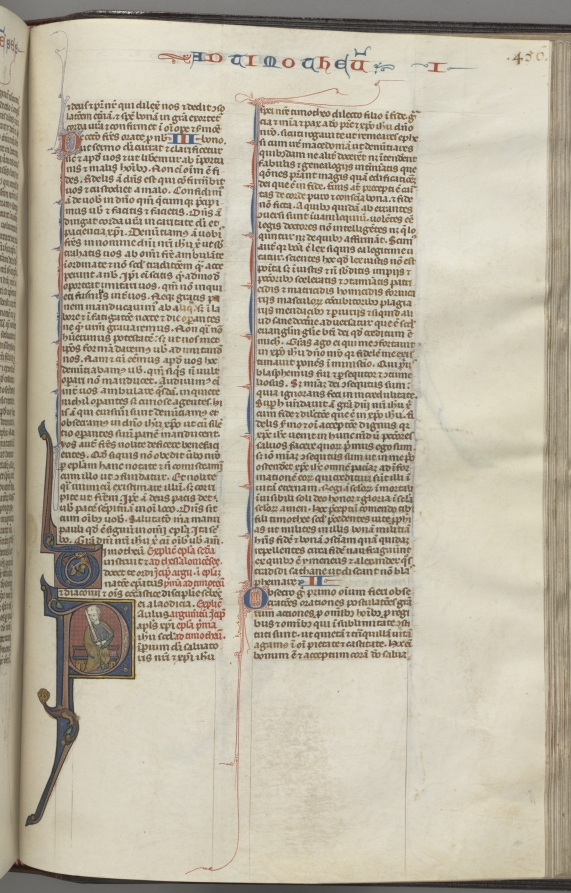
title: Fol. 456r, Timothy I, historiated initial P, Paul seated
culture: Southern France, Toulouse(?), 13th century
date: c. 1275–1300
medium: ink, tempera and gold on vellum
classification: Bound Volume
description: Biblical manuscripts were highly prized and important possessions of churches, monasteries, cathedral schools, and universities throughout medieval Europe. The biblical texts were known as the vulgate, the translations made by Saint Jerome in the fourth century from Hebrew and Greek into Latin, which became the definitive and official Latin version of the Roman Church. In the 13th century, the bible was, for the first time, produced as a single volume with an officially sanctioned sequence to its books and chapters as illustrated by this example. The very extensive decoration of this bible is arranged hierarchically to indicate the relative importance of the various texts so that full or almost full-page initials mark the openings of the first prologue, Genesis, and the first Gospel; historiated initials mark the beginning of each book and illuminated initials mark the Prologues.